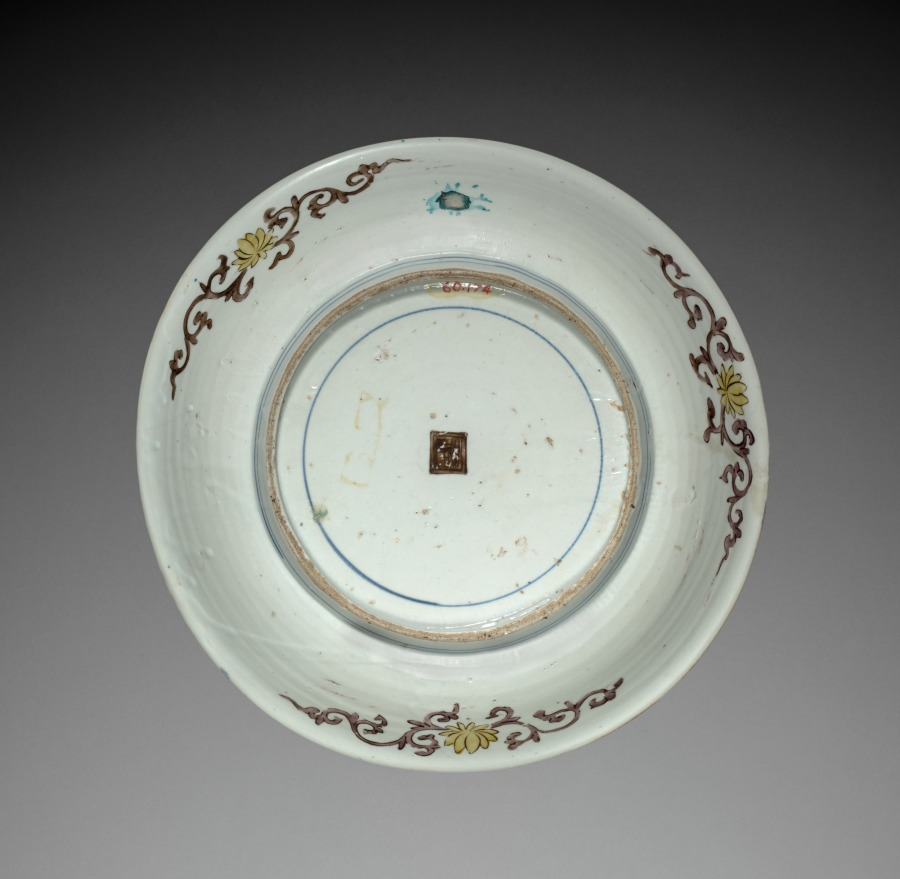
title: Plate with Bird and Flower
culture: Japan, Edo period (1615–1868)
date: mid- to late 1600s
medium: Porcelain with overglaze enamel (Hizen ware, Ko-Kutani style)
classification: Ceramic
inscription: "FUKU" in square seal under aubergine glaze.